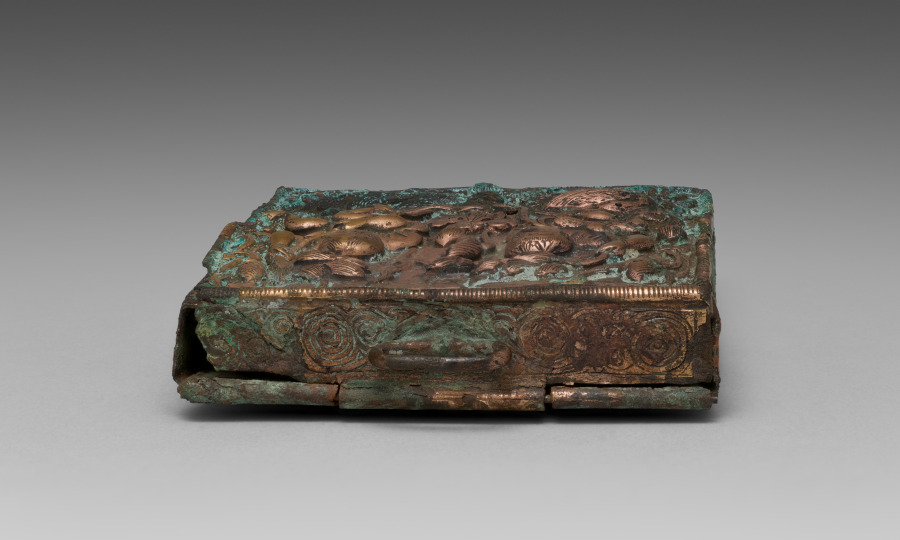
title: Sutra Container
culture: Korea, Goryeo dynasty (918–1392)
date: 1100s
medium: gilt bronze with incised and high relief decoration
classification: Metalwork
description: This is a portable container once used to preserve a miniature Buddhist sacred text. Created by hammering the reverse, high-relief designs on both the front and back of the case depict a peaceful pond where young boys are holding giant lotus flowers in their hands, and a pair of mandarin ducks are swimming. Probably the playful boys represent newly reborn souls in the Pure Land.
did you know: This is a portable container once used to preserve a miniature Buddhist sacred text, particularly useful for traveling Buddhist pilgrims.